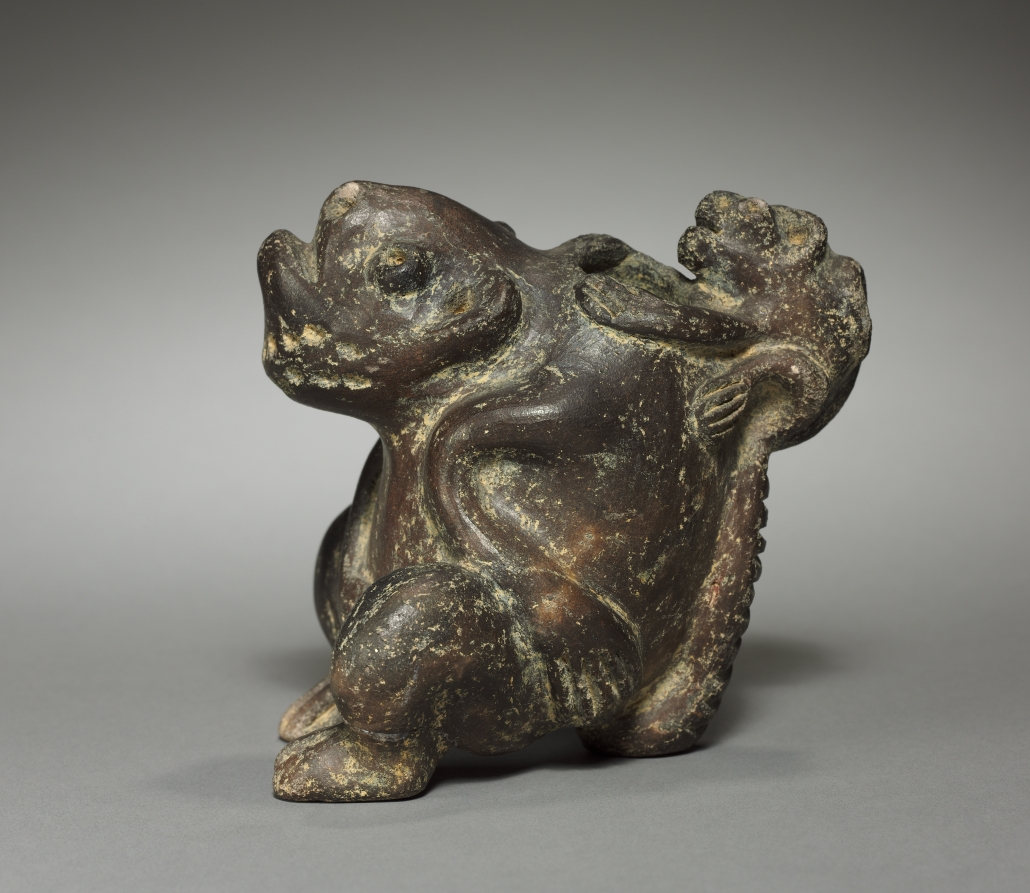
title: Jar in Shape of Grotesque Beasts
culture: Colombia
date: before 1921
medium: pottery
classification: Ceramic